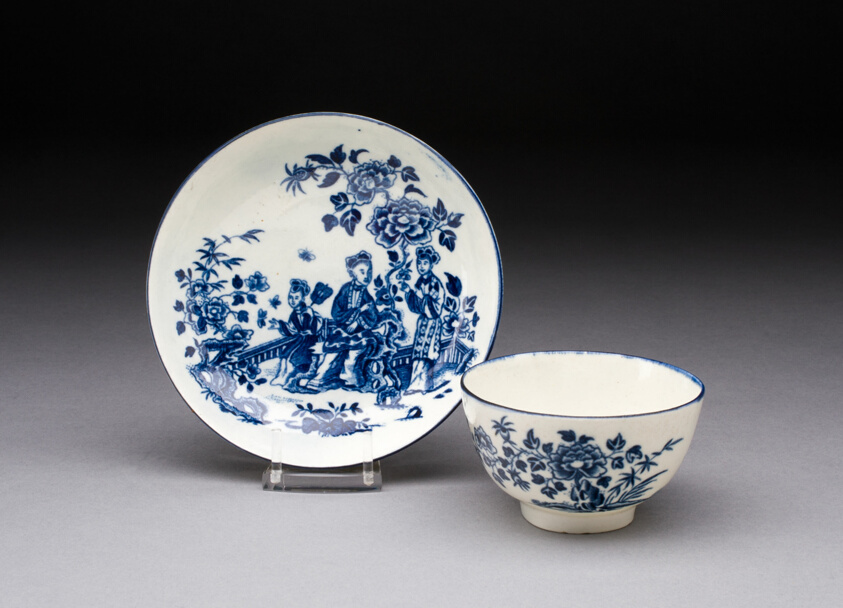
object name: Ceramics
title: Cup and Saucer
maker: Worcester Porcelain Factory (Warmstry House Period, 1751–1783); Worcester, England, founded 1751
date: c. 1775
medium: Soft-paste porcelain with underglaze blue decoration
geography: Worcester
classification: drinking vessel; teaware; porcelain; european decorative arts; ceramics